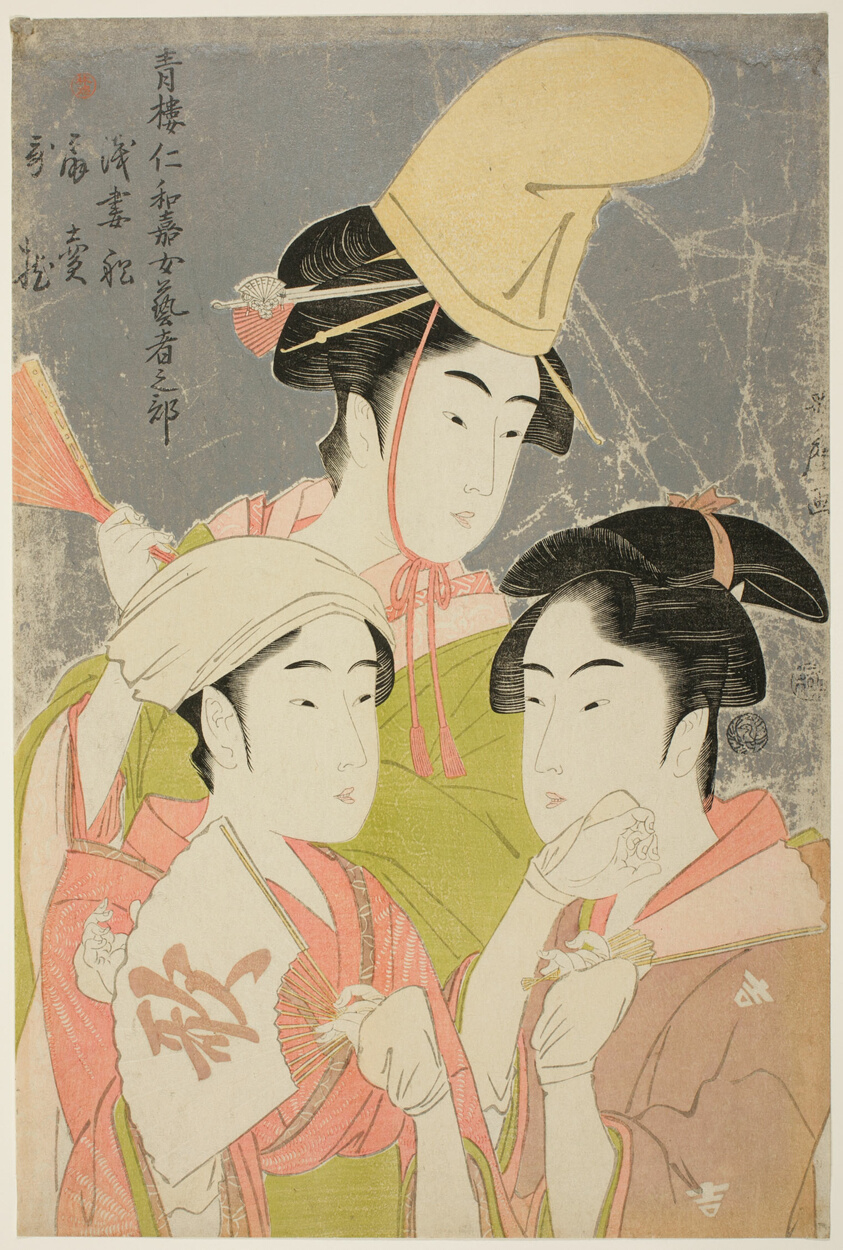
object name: Print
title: Seiro niwaka onna geisha no bu : Asazumabune Ogiuri Uta.....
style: Japanese (culture or style)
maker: Kitagawa Utamaro 喜多川 歌麿; Japanese, 1753 (?)-1806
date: 1793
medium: Color woodblock print; oban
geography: Japan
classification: woodblock print; print; asian art